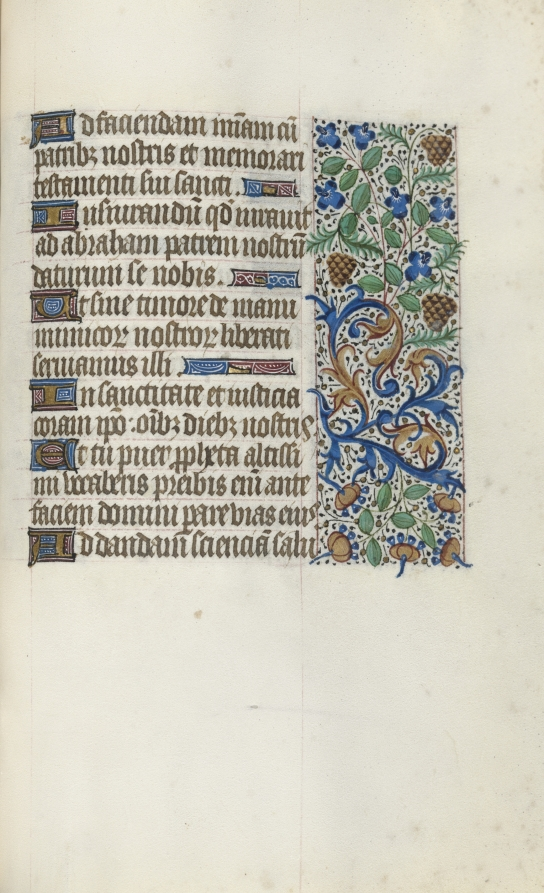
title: Book of Hours (Use of Rouen): fol. 144r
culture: France, Rouen, 15th century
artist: Master of the Geneva Latini (French, active Rouen, 1460–80)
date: c. 1470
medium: ink, tempera, and gold on vellum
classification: Bound Volume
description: In the late 1400s and early 1500s Rouen was an established and important center of book production. The city’s cathedral had a wealthy chapter that spent large sums of money to commission books and to maintain its extensive library. The stationers and booksellers would have likely been concentrated in or near the cathedral precinct. This artist, named after a manuscript now in Geneva, was Rouen’s principal illuminator during the second half of the 1400s.